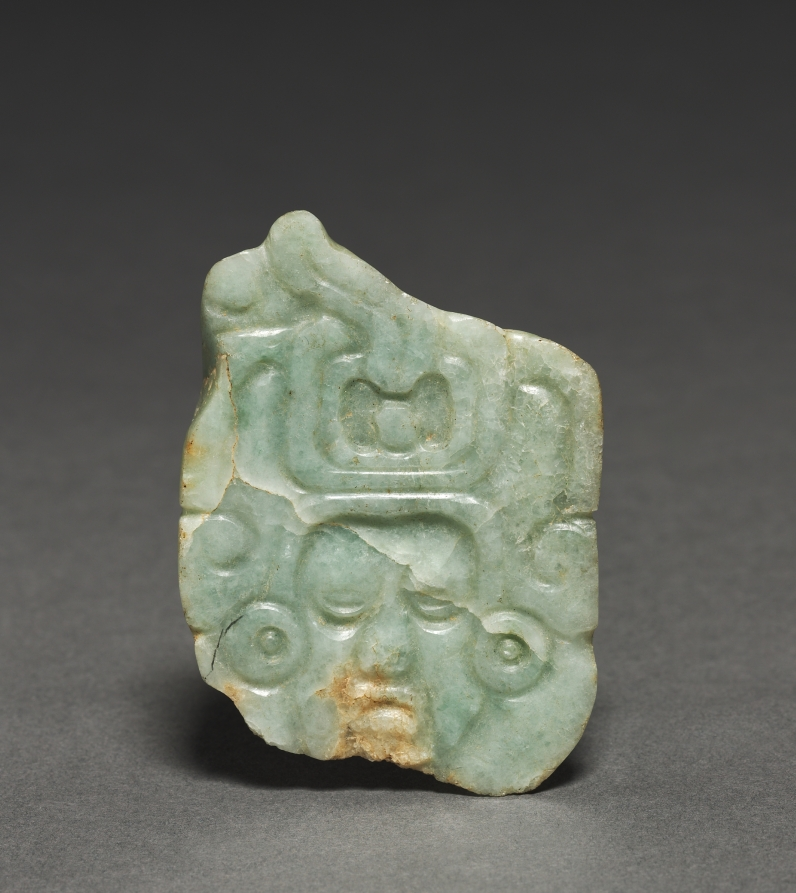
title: Pendant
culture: Maya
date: 250–900 CE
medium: jadeite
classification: Jade